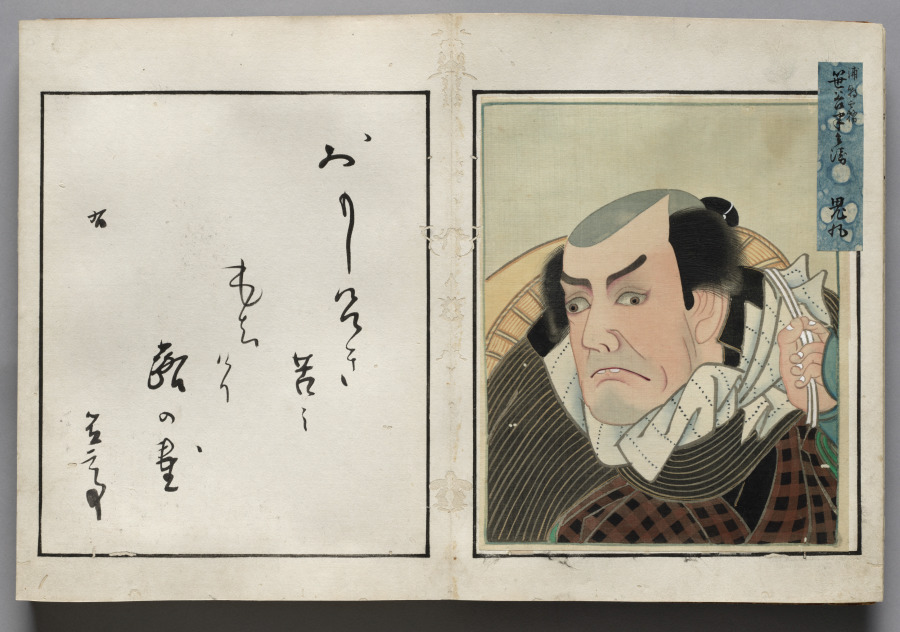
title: Double-Leaf from Album of Actor Portraits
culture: Japan, Edo period (1615–1868)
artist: Shōrakusai (Japanese)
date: c. 1790–1810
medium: double-leaf from an accordion-style album; ink and color on silk (right) and ink on paper (left)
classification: Bound Volume